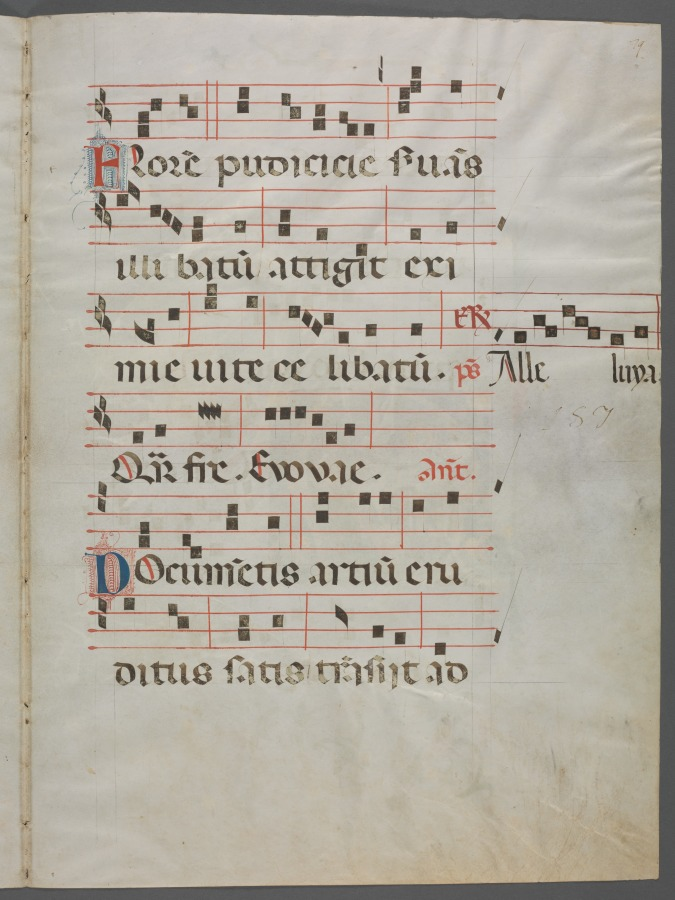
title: Bifolium from an Antiphonary: Music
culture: Italy, Bologna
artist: Primo Miniatore di San Domenico (Italian)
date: c. 1320–40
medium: ink, tempera, and gold on parchment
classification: Manuscript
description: The representation of Saint Dominic (1170–1221), founder of the Dominican Order of Preachers, in this initial suggests that this double page was at one time part of a manuscript made for a Dominican convent. Saint Dominic traveled much, preaching throughout Europe, and was particularly venerated in Bologna, the city in which he died and was buried. The illuminator of this initial is named after a volume he decorated of Seneca’s works (now in the Bibliothèque nationale in Paris). His workshop specialized in large-scale manuscripts destined for wealthy religious institutions in the region of Emilia, for which Bologna was the artistic and intellectual center.